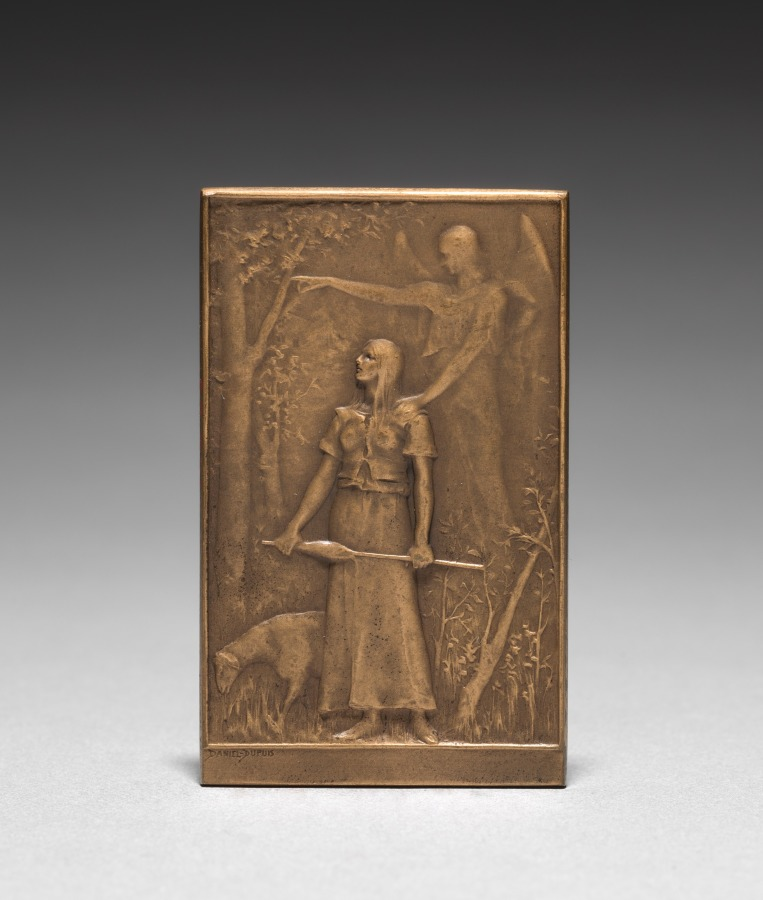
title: Medallion: Jeanne d'Arc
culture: France, 19th century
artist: Daniel Dupuis (French, 1819–1899)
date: c.1900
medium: bronze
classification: Metalwork